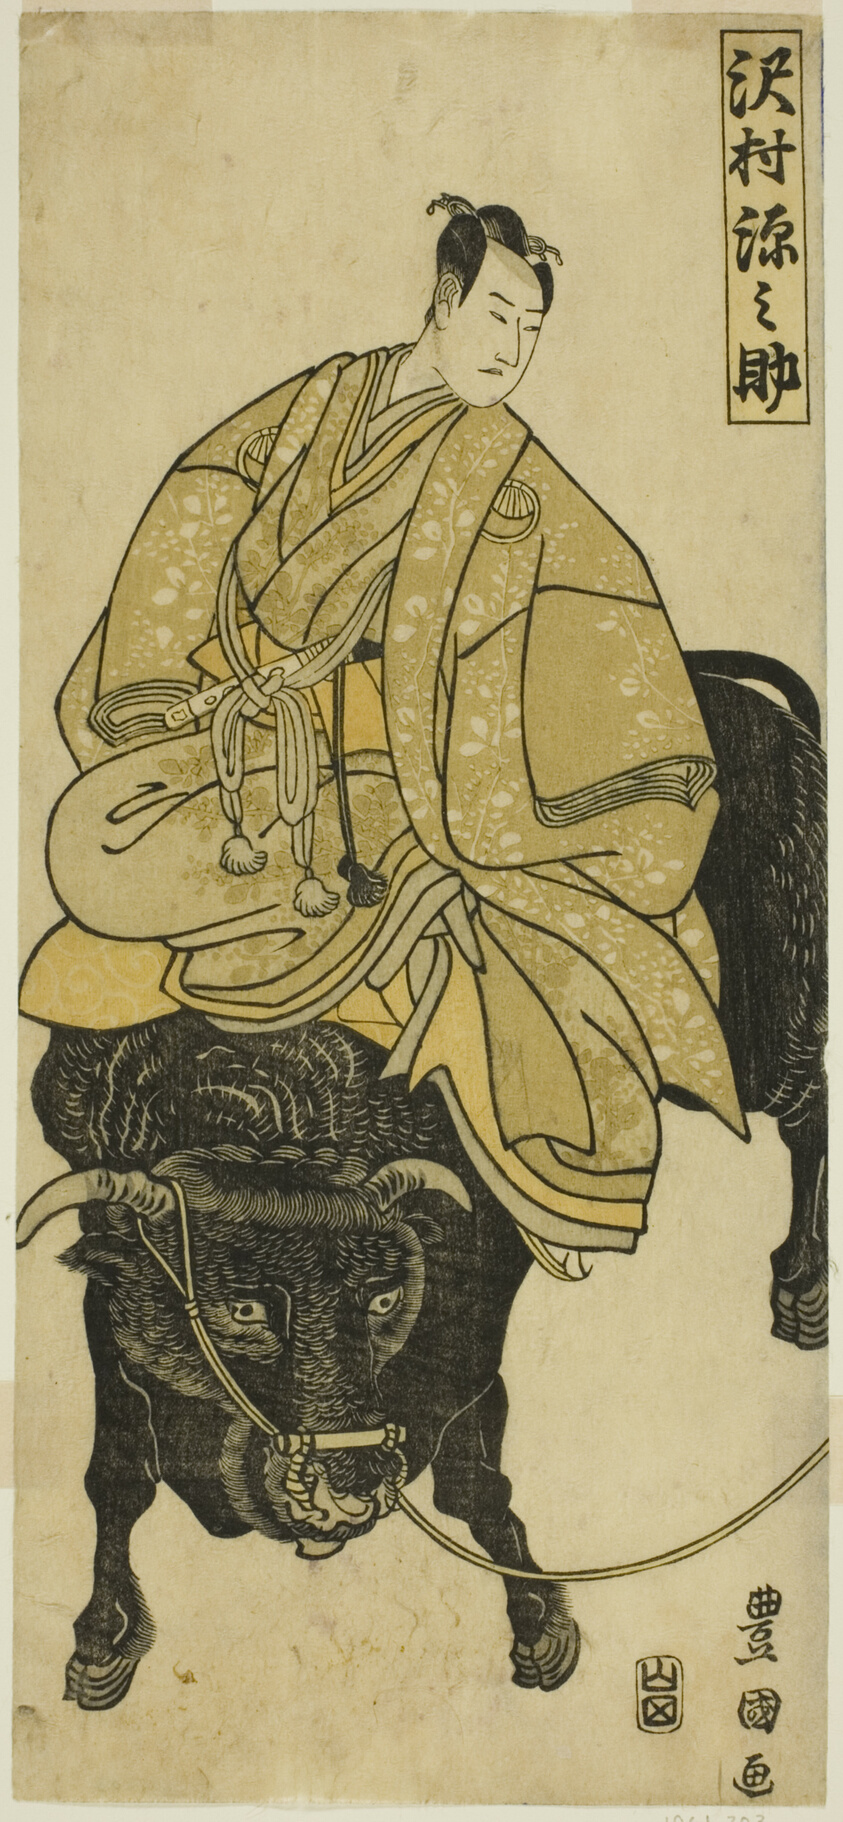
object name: Print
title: Actor Sawamura Gennosuke Riding on Ox as Sugawara no Michizane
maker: Utagawa Toyokuni I 初代 歌川 豊国; Japanese, 1769–1825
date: Early 19th century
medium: Color woodblock print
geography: Japan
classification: print; asian art